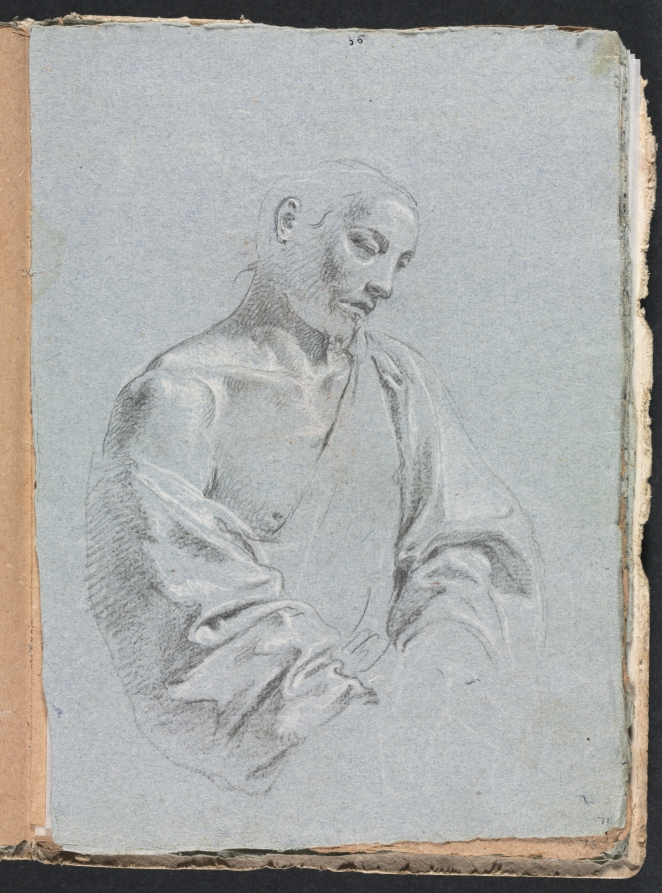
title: Verona Sketchbook: Male figure with drapery (page 71)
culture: Italy, 18th century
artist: Francesco Lorenzi (Italian, 1723–1787)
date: 1760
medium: black chalk with white heightening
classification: Bound Volume